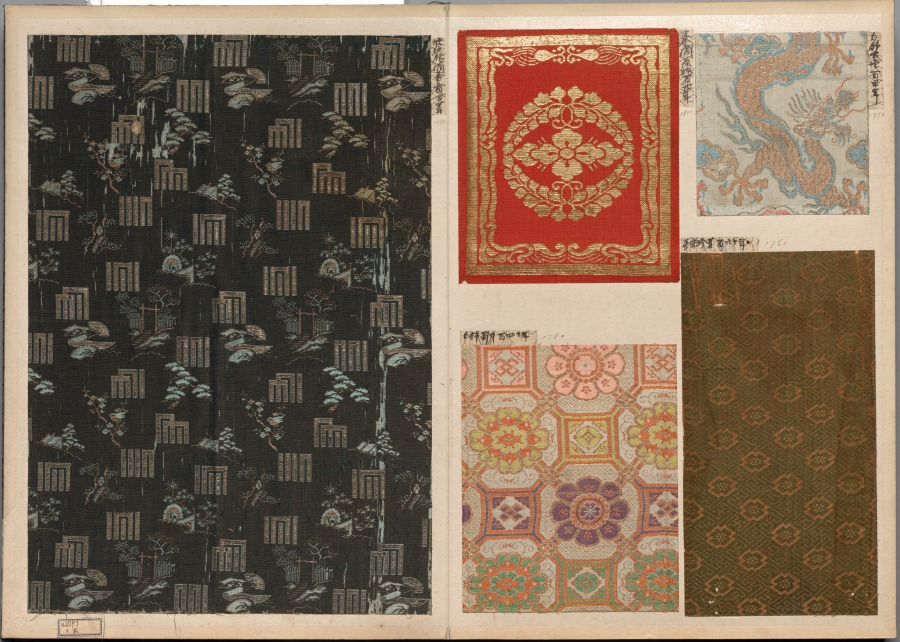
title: Album of Textile Samples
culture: Japan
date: 1790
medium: silk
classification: Textile